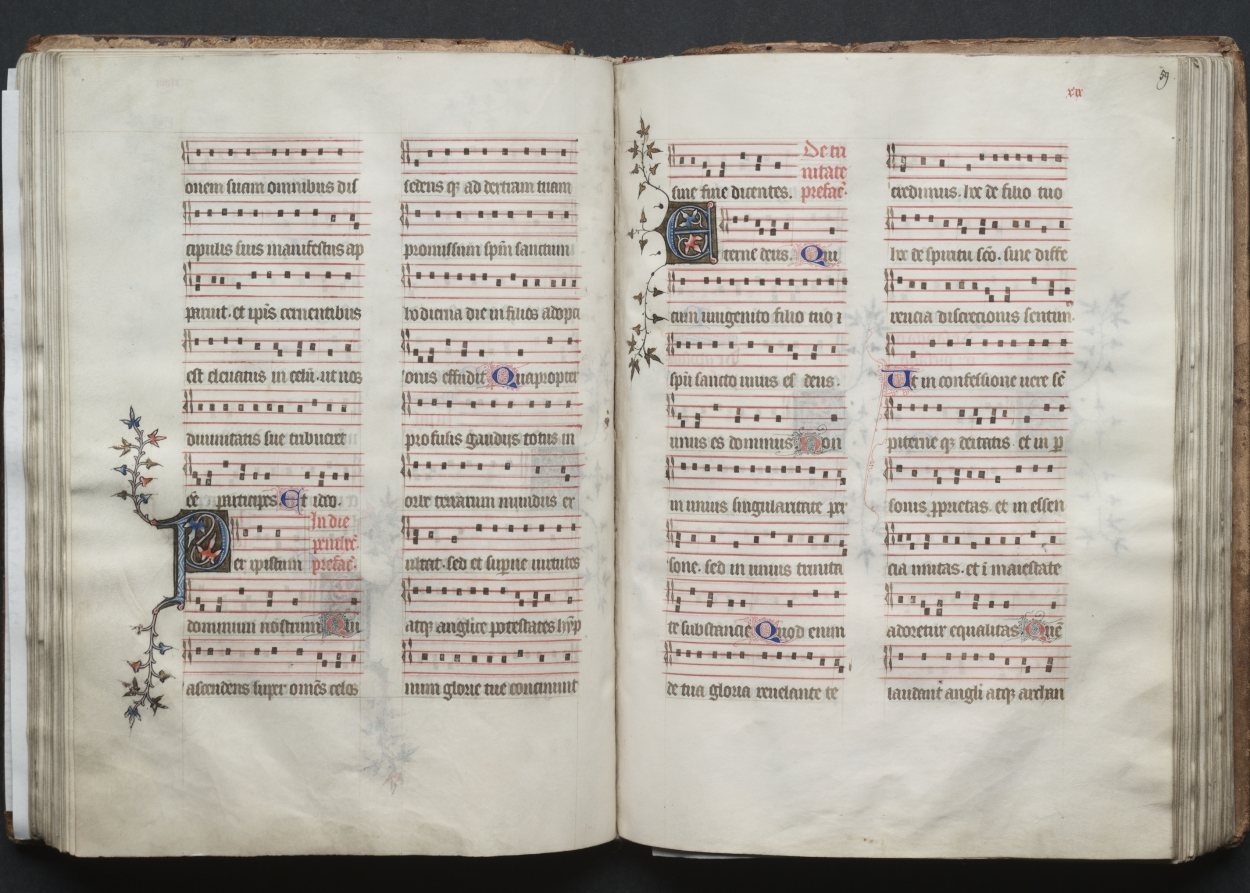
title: The Gotha Missal: Fol. 58v, Text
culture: France, Paris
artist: Master of the Boqueteaux (French)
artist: and Workshop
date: c. 1375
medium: ink, tempera, and gold on vellum; blind-tooled leather binding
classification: Bound Volume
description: The style and quality of this manuscript's decoration is typical of deluxe Parisian books made for aristocratic or royal patrons. Most of the book's decoration appears to be the work of the Master of the Boqueteaux, an artist active at the court of King Charles V (died 1380). His style was apparently shared by a number of book illuminators working in and around Paris. It is very possible that the Gotha Missal belonged to Charles V, but is not provable because the manuscript has no royal portraits and lacks a colophon. Given the book's magnificent decoration, however, it would seem that it was produced for a Valois prince, if not for the king himself. The manuscript receives its name from the German dukes of Gotha, its later owners.